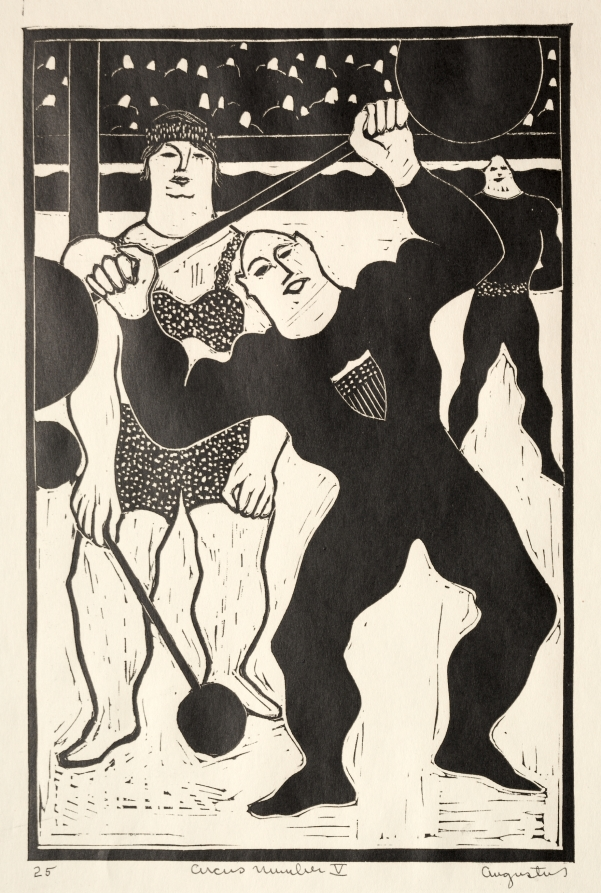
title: Circus, No. 5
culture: America, Ohio, Cleveland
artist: Augustus Peck (American, 1906–1975)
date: 1920–30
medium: linoleum cut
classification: Print